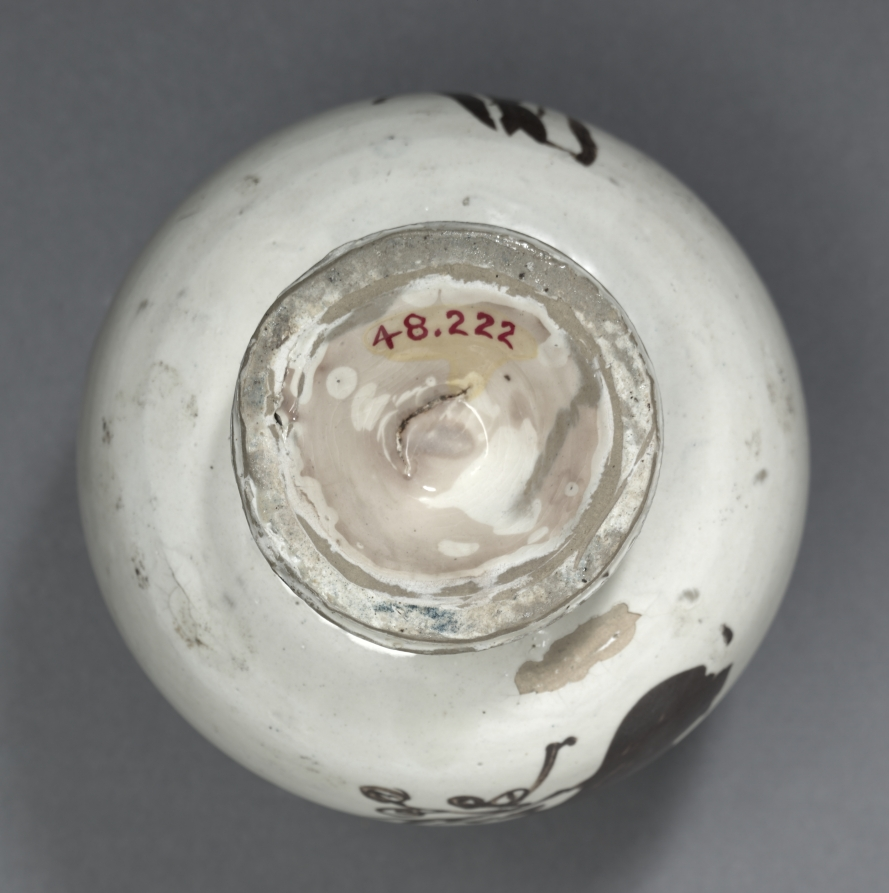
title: Cup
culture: Northern China, Jin dynasty (1115-1234) or Yuan dynasty (1271-1368)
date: 1200s–1300s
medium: stoneware with underglaze painted decoration, Cizhou ware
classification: Ceramic